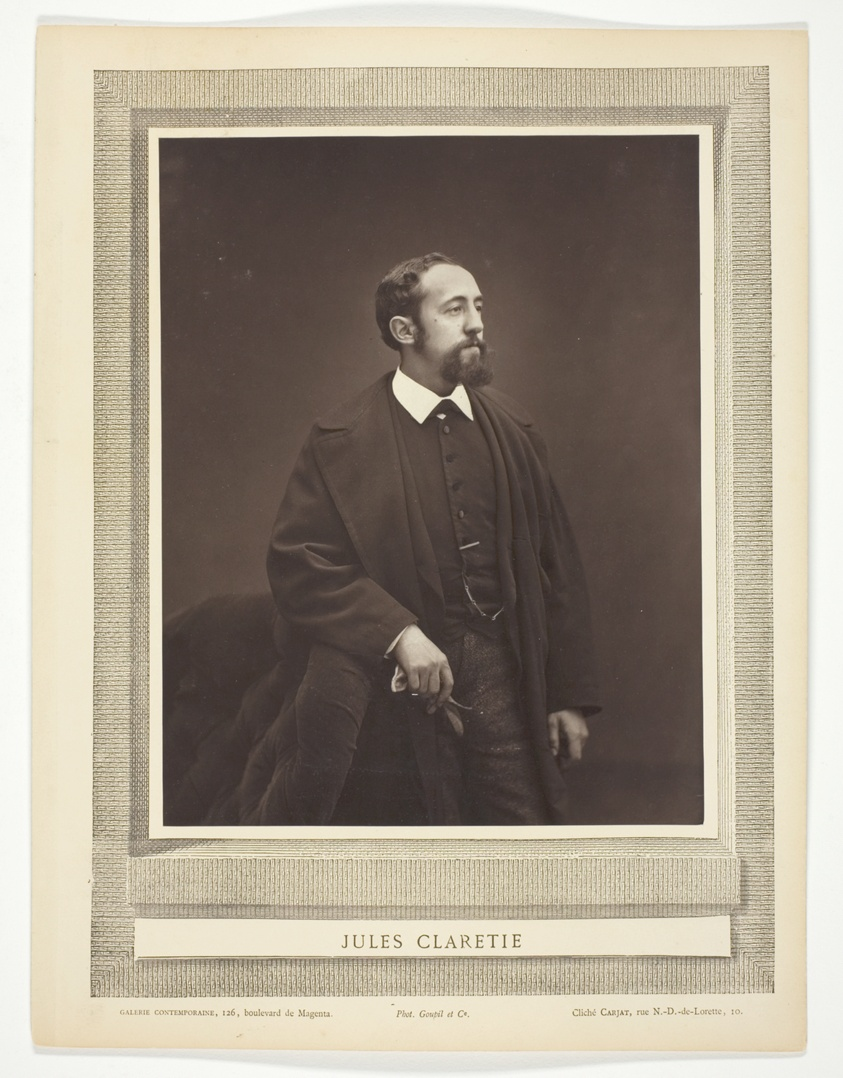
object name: Photograph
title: Jules Claretie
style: 19th century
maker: Etienne Carjat (French, 1828–1906)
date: c. 1876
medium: Woodburytype, from the periodical “Galerie Contemporaine Littéraire, Artistique” (1876), volume 1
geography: France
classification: woodburytype; photomechanical process; photography; photograph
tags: Collected by Hugh Edwards, Contemporaine Littéraire